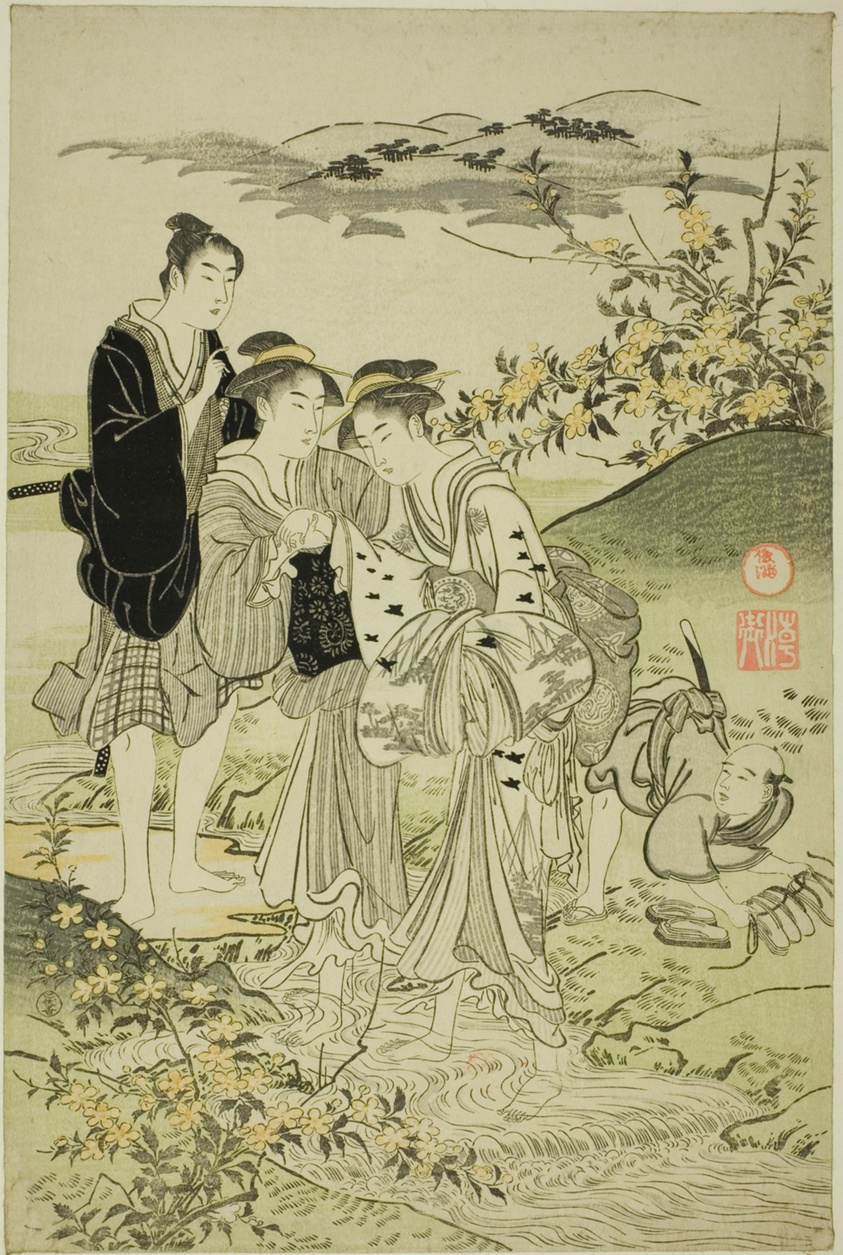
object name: Print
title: The Ide Jewel River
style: Japanese (culture or style)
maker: Kubo Shunman (Japanese, 1757–1820)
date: c. 1781/89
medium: Color woodblock print; sheet from oban hexaptych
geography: Japan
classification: woodblock print; print; asian art